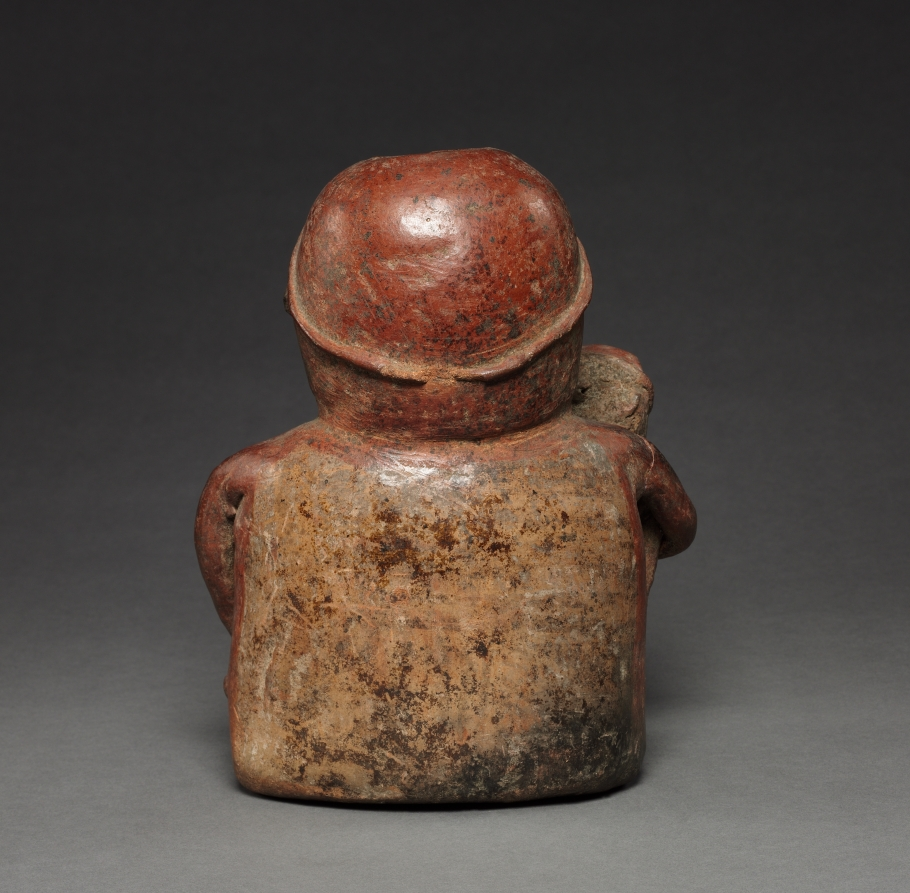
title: Figures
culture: Colombia, 18th-19th century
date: before 1921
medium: red ware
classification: Ceramic